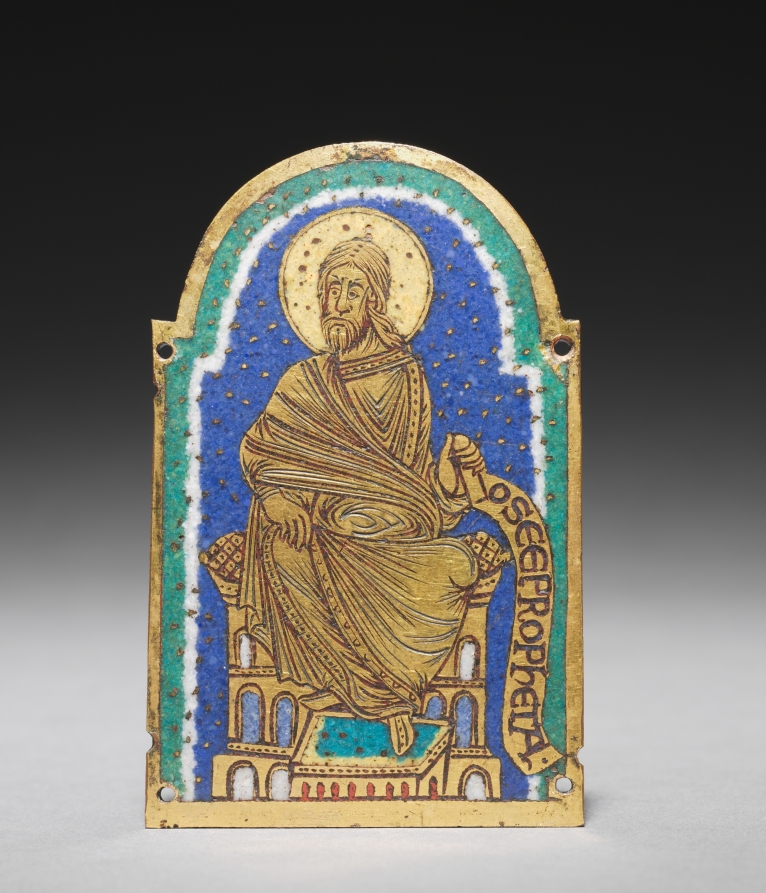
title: Plaque with Seated Prophet from a Reliquary Shrine: Osea (Hosea)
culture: Germany, Lower Saxony, Hildesheim, Romanesque period, 12th century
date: c. 1170–80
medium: gilded copper, champlevé enamel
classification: Enamel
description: Once used as decorations for a reliquary shrine, each enamel plaque represents a biblical prophet: Isaiah, Obadiah, Elisha, and Hosea. Fine gold dots punctuate dark blue backgrounds. Typical of Hildesheim enamels, this detailing creates the illusion that the prophets sit against star-studded twilight skies.